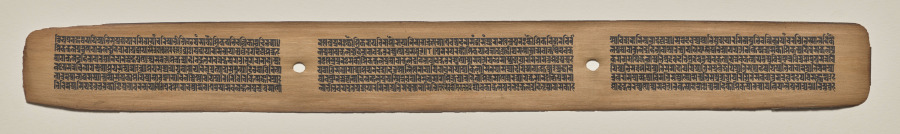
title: Text, Folio 40 (recto), from a Manuscript of the Perfection of Wisdom in Eight Thousand Lines (Ashtasahasrika Prajnaparamita-sutra)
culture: Eastern India, Bihar, Vikramashila Monastery. Painting: Nepal, Kathmandu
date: Sunday, September 14, 1119 (year 239 of the Newar Samvat in the month of Ashvina)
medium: gum tempera and ink on palm leaves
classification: Painting